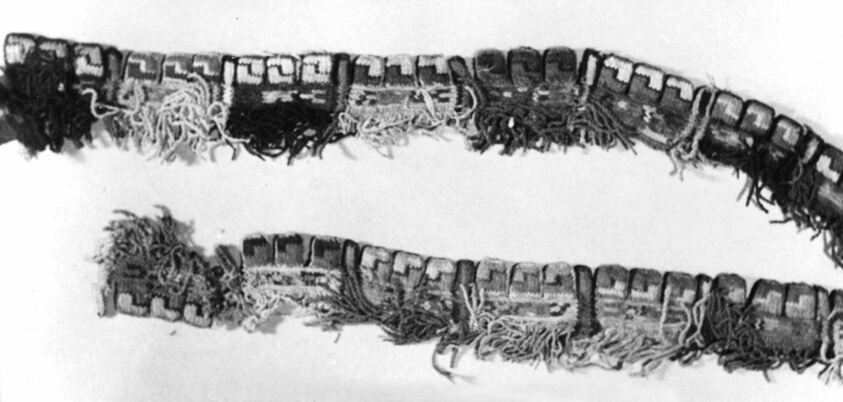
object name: Textile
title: Fragment (Border)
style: nazca, andean, andes, Pre-Columbian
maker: Nazca; Nazca Valley, south coast, Peru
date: 100 B.C./A.D. 200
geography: Peru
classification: textile; weaving